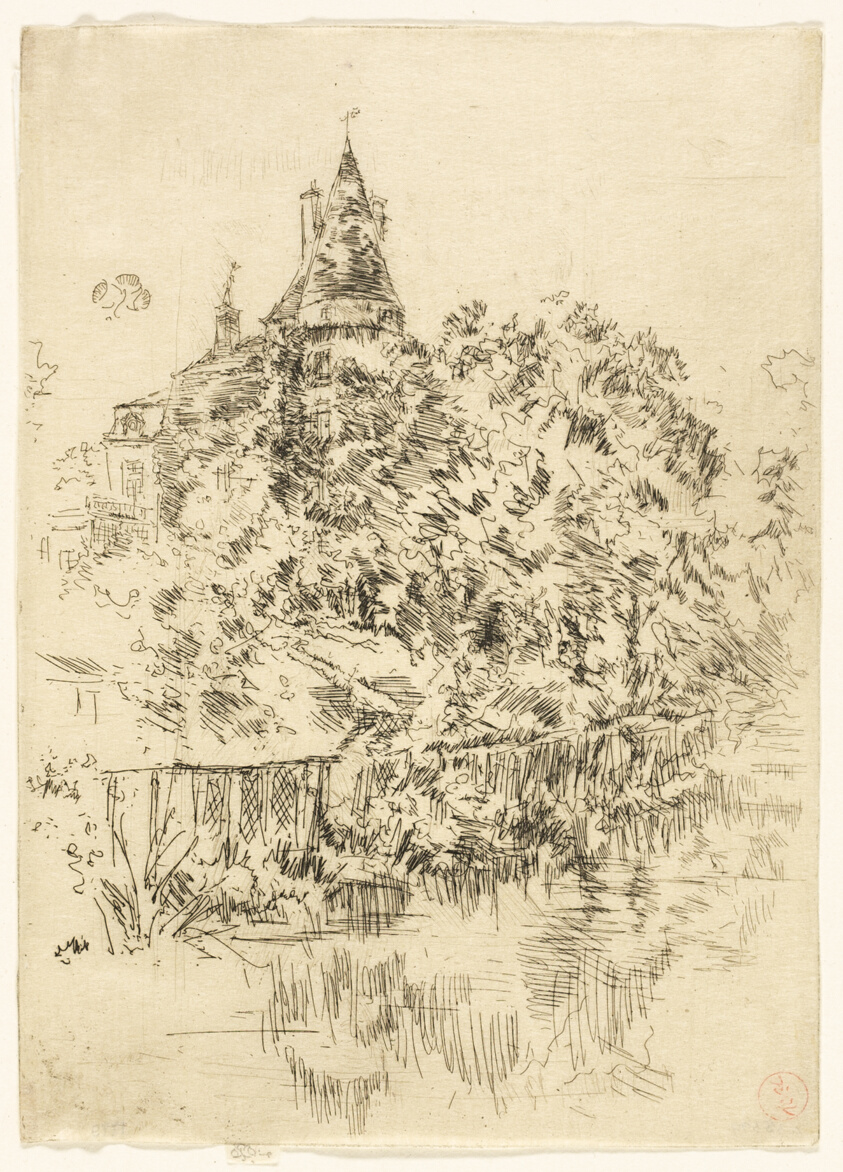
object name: Print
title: Château de Verneuil, Touraine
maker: James McNeill Whistler (American, 1834-1903)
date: 1888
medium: Etching with foul biting in black ink on cream Japanese paper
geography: United States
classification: etching; foul biting; print; prints and drawing; paper